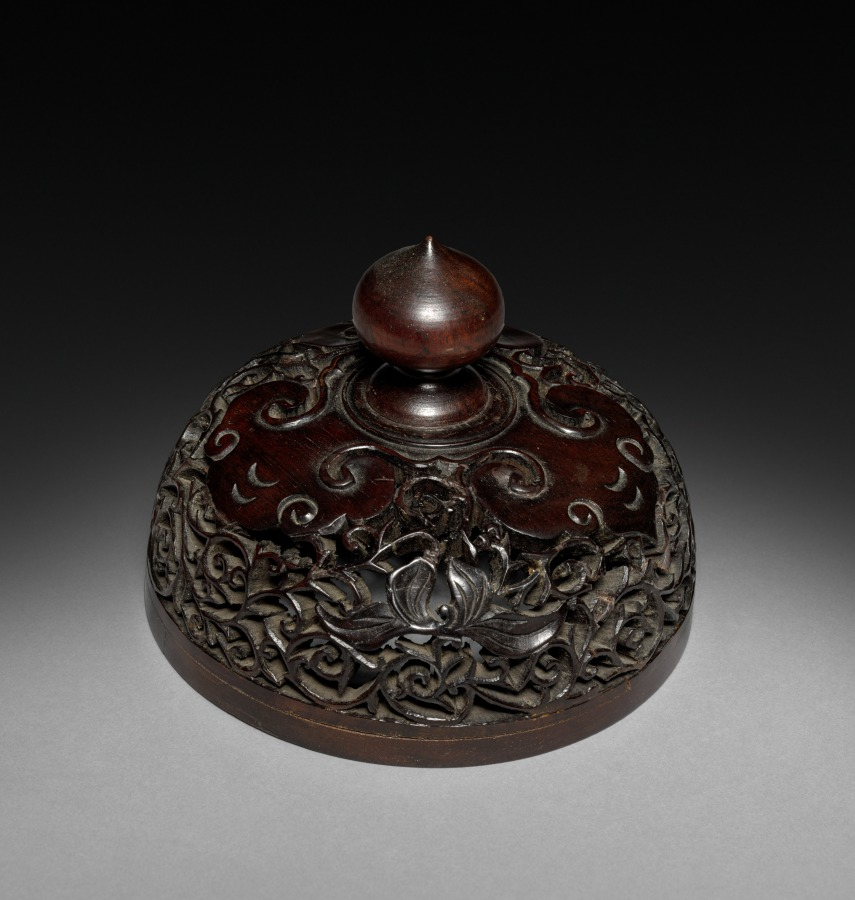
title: Vase (lid)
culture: China, Qing dynasty (1644-1911), Kangxi reign (1661-1722)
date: 1622–1722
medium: carved wood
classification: Ceramic